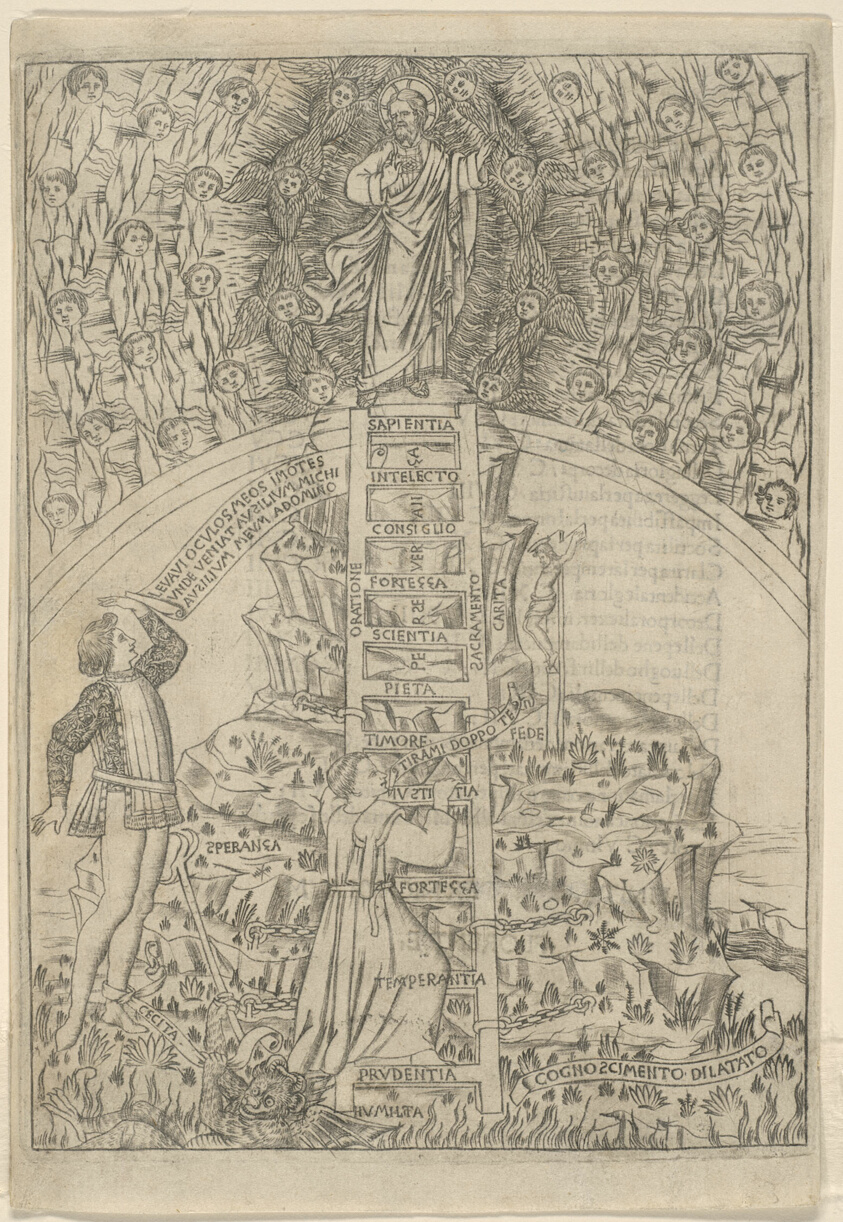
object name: Print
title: The Holy Mountain, folio 3 from The Holy Mountain (Monte Sancto di Dio)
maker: Baccio Baldini (Italian, c. 1436-1487); text by Antonio Bettini, Bishop of Foligno (Italian, 1396-1487)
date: 1477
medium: Engraving in black with letterpress on verso, on ivory laid paper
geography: Italy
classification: engraving; print; prints and drawing